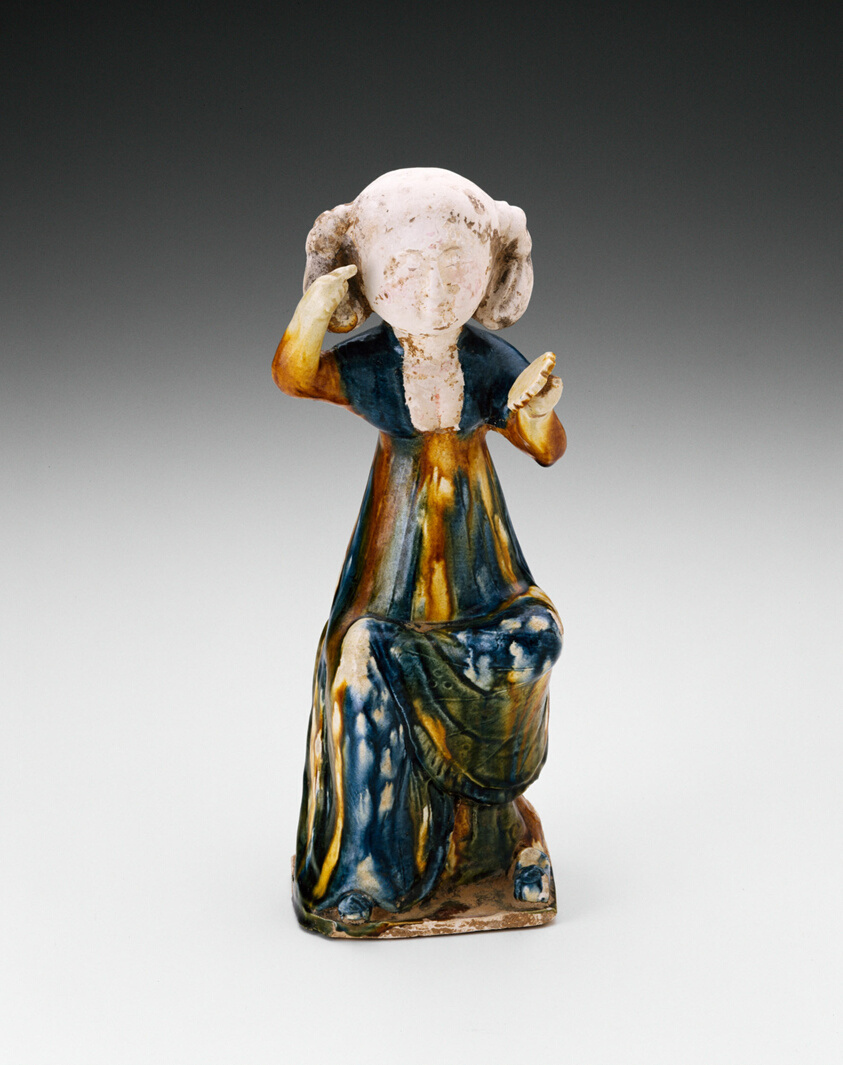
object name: Sculpture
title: Seated Girl Holding Mirror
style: Chinese (culture or style)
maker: China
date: Tang dynasty (618–907), first half of 8th century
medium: Earthenware with three-color (sancai) lead glazes and traces of pigments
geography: China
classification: earthenware; asian art; ceramics; decorative arts